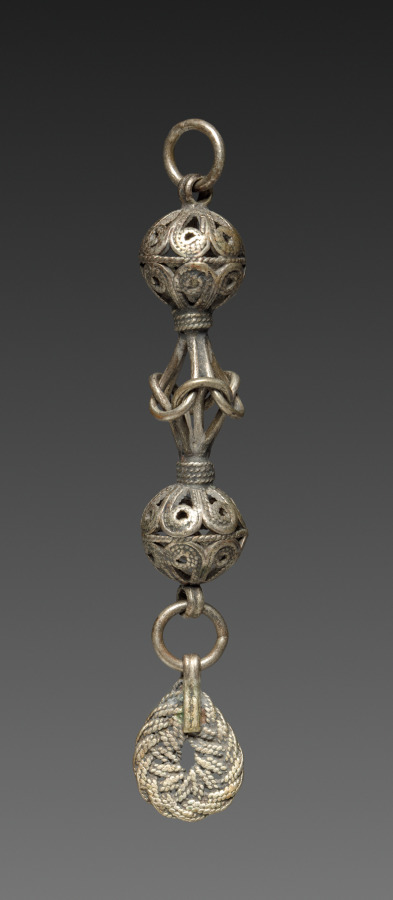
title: Button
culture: Balkans, 19th century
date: 1800s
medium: silver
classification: Jewelry